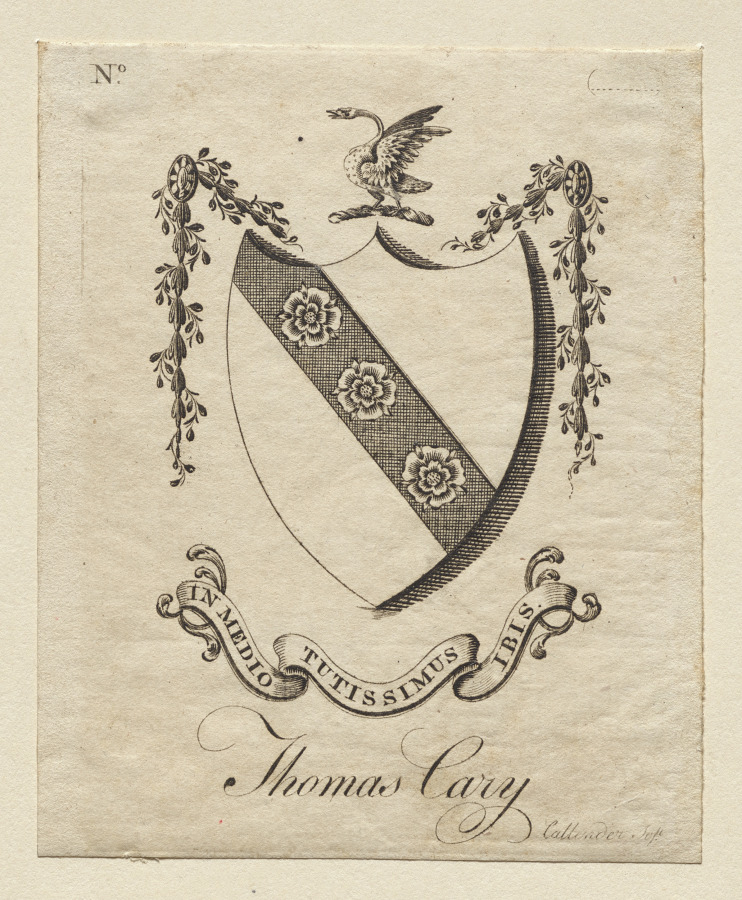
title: Bookplate: Coat of Arms with Thomas Cary inscribed below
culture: America, late 18th-early 19th century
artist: Joseph Callender (American, 1751–1821)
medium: engraving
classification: Print